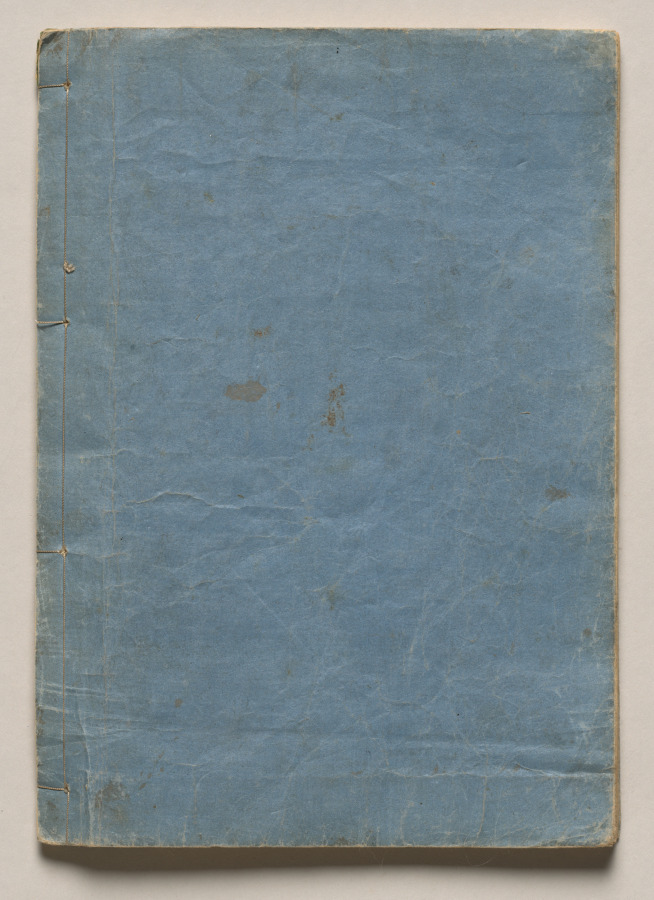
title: Volume One of People of Japan in Light Verse (Kyōka)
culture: Japan, Edo period (1615–1868)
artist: Utagawa Hiroshige (Japanese, 1797–1858)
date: 1857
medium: Woodblock-printed book; ink and color on paper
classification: Bound Volume